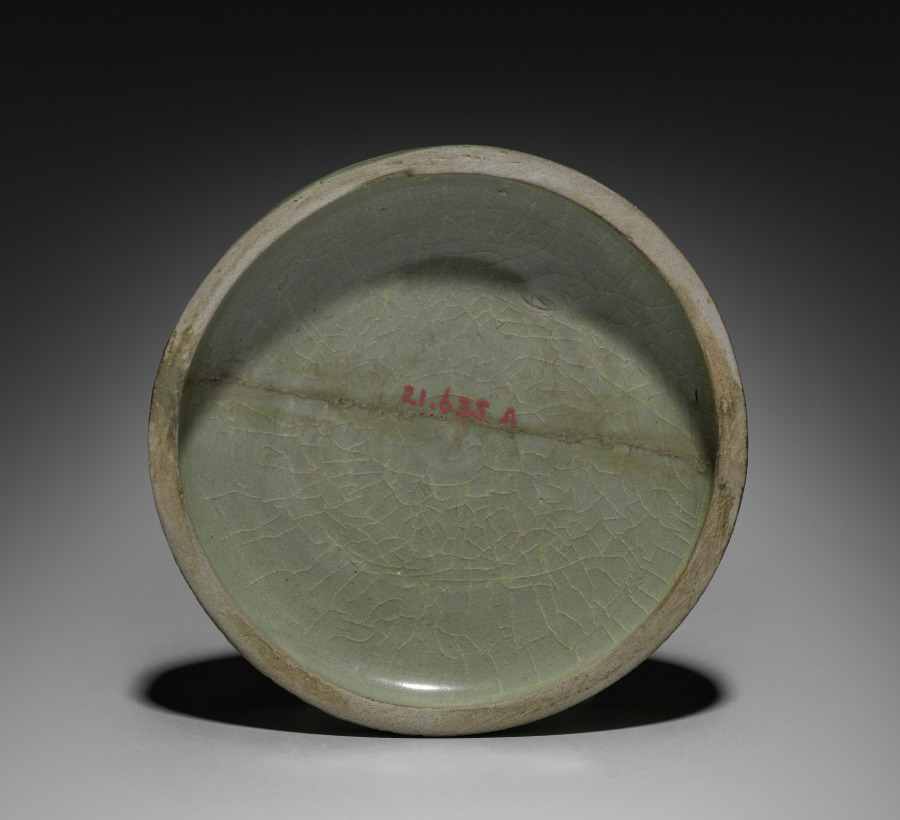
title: Box (lid)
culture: Korea, Goryeo dynasty (918–1392)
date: 918–1392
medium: pottery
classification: Ceramic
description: Celadons, spoons, seals, and bronze mirrors were the most common burial objects in tombs during the Goryeo period (918–1392). Once used to contain colored powder, rouge, and eyebrow gel for makeup, this small container was one of the standard goods that furnished tombs of the elites. Both women and men used the grain powder of rice or millet for whitening their skin, safflower extract for rouge, and plant ash or soot for eyebrow gel. Yet, natural-looking makeup seems to have been the most favorable one in Korea according to the travelogue by Xu Jing (1091–1153), the Chinese diplomat who visited Korea in 1123.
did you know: This ceramic container was used to store either incense or cosmetics.